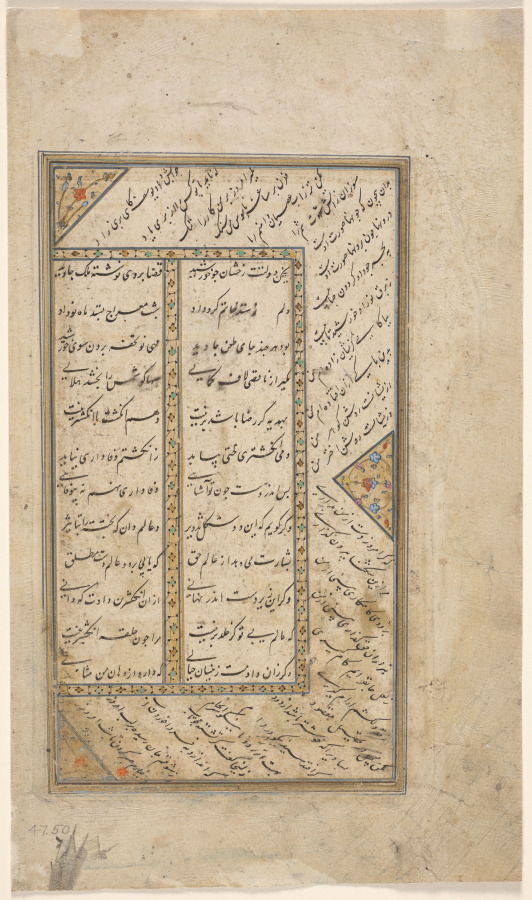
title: Text Page, Persian Verses (verso) in an Anthology with some verses from Haft Awrang (Seven Thrones) of Jami; The Fifth Throne Yusuf and Zulaykha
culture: Iran, Shiraz or Mashhad, Safavid period (1501-1722)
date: mid-1500s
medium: opaque watercolor, ink, and gold on paper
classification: Manuscript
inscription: Script: Nasta'liq